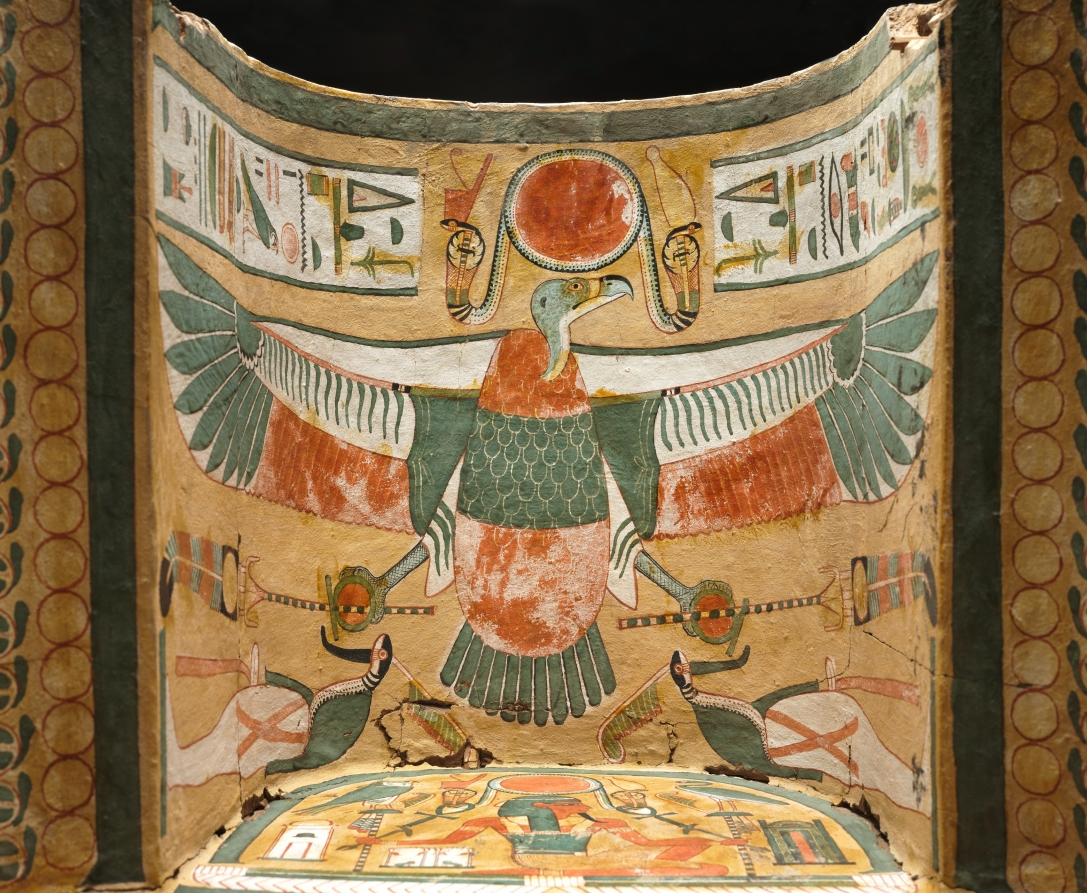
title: Coffin of Bakenmut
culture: Egypt, Thebes, Third Intermediate (1069–715 BCE), Dynasties 21–22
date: c. 1000–900 BCE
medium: gessoed and painted sycamore fig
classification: Funerary Equipment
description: The coffin of Bakenmut is one of the finest examples of painted wooden coffins made for the priests of Amen and their families at Thebes during Dynasty 21 and early Dynasty 22. The pharaohs of this time were no longer buried in the Valley of the Kings, but instead built tombs in the Delta, far to the north, where they resided. Security was lax in the Theban necropolis. The coffins and funerary goods of the wealthy citizens of Thebes were placed in unmarked and undecorated family tombs cut into the cliffs on the west bank of the Nile. All the care and detail that in more prosperous times were devoted to the decoration of the tomb chapel were now lavished on the elaborately painted coffins. Every available surface is crowded with religious scenes, images of funerary gods and goddesses, protective spells, and magical symbols. The deceased appears mummiform. An elaborate floral collar entirely covers the upper body, exposing only the separately attached hands (now lost). A pair of red "mummy braces" are crossed over the chest, their point of intersection marked by a winged sun disk. The lower body is covered with tiny figures modeled in gesso against a yellow background, which gives the effect of gold inlaid with glass or semiprecious stone. The decoration on the interior features two deified dead kings of Dynasty 18. Although these rulers had lived centuries before, memory of their greatness was still very much alive. The main scene near the top depicts Tuthmosis III, the great military pharaoh, who lived 500 years before Bakenmut. Posed as a mummy, the ruler wears a brilliant feathered garment enfolding him with falcon’s wings. The scene below features back-to-back seated images of Amenhotep I, regarded as the patron of the Theban cemetery and worshiped as a local god there.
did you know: Originally another smaller coffin was placed inside this outer coffin and in that the deceased with a mummy board would have rested.